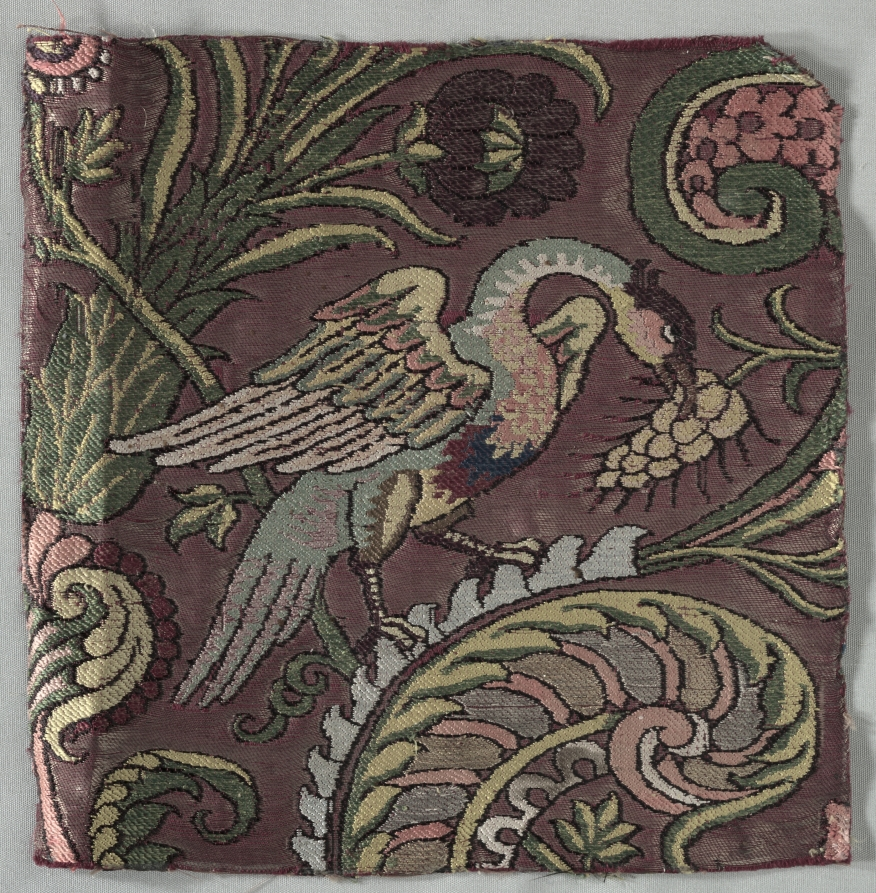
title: Textile Fragment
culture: Italy, 17th century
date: 1600s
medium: compound twill weave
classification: Textile